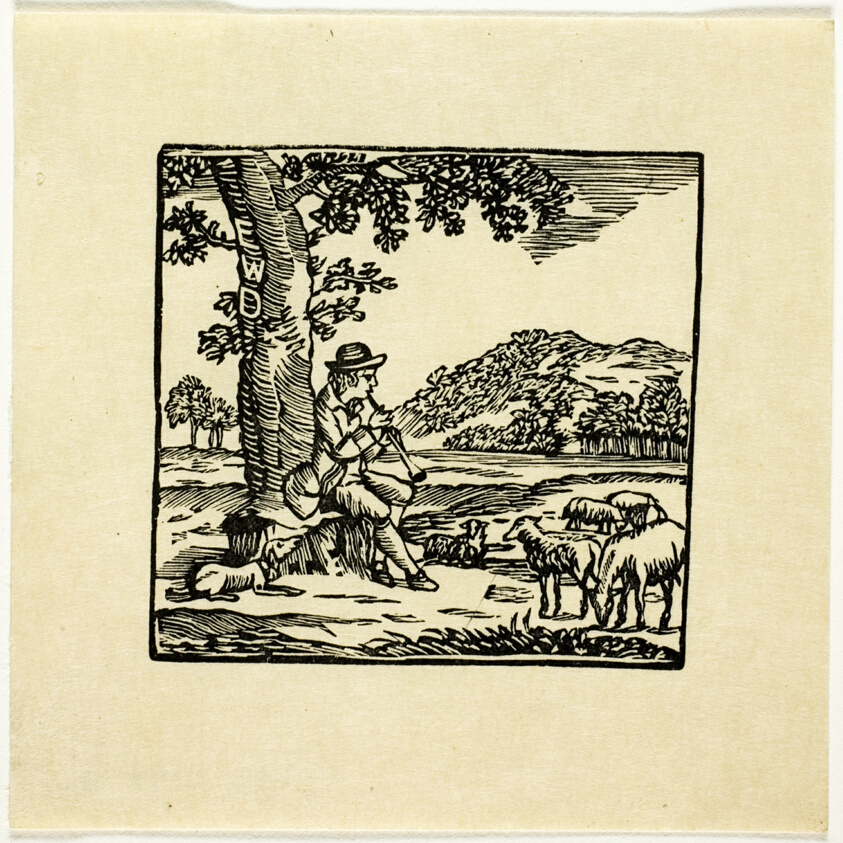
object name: Print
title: Book Illustration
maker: Thomas Bewick (English, 1753-1828)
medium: Wood engraving on paper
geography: England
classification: wood engraving; print; prints and drawing